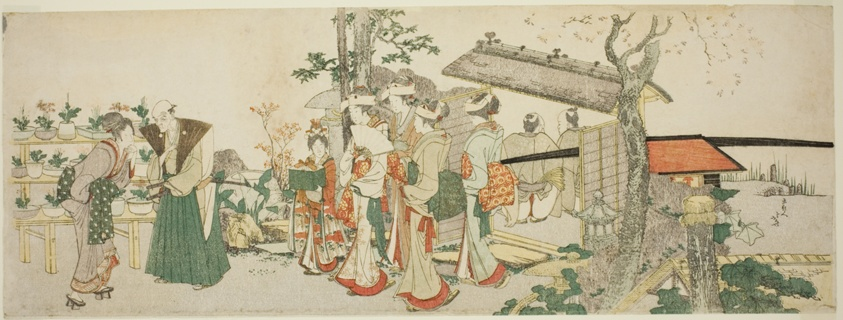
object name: Print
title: A Group of Young Women Entering the Garden of a Horticulturist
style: Japanese (culture or style)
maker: Katsushika Hokusai 葛飾 北斎; Japanese, 1760-1849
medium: Color woodblock print; surimono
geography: Japan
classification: woodblock print; print; asian art